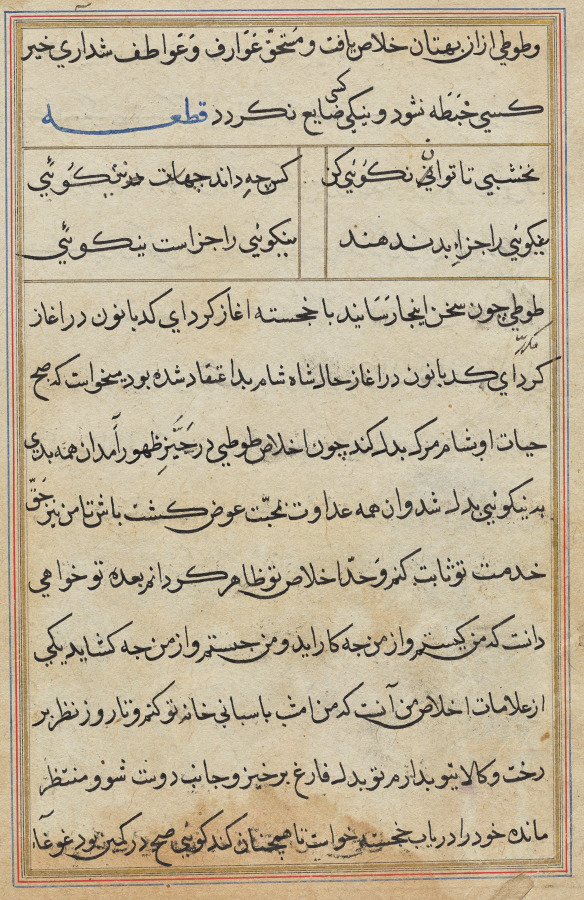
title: Page from Tales of a Parrot (Tuti-nama): text page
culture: Mughal India, court of Akbar (reigned 1556–1605)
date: c. 1560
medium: gum tempera, ink, and gold on paper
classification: Painting